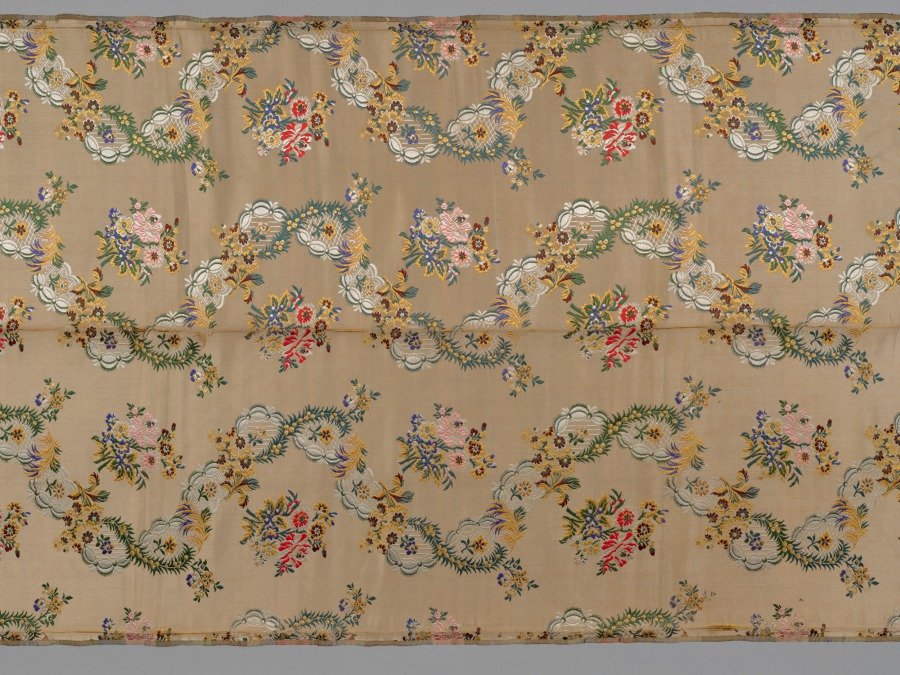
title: Length of Textile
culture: Japan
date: late 1800s-early 1900s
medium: lampas weave, brocaded; silk and gold thread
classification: Textile